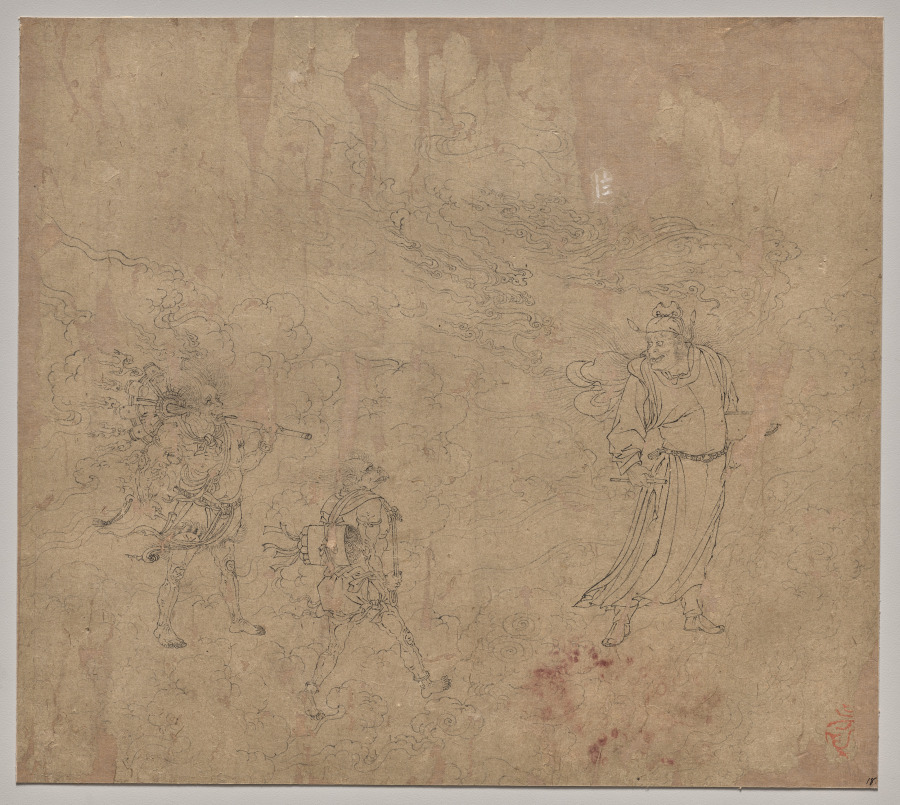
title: Album of Daoist and Buddhist Themes: Procession of Daoist Deities: Leaf 18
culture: China, Southern Song dynasty (1127-1279)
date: 1200s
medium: Album, ink on paper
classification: Painting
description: This leaf is part of an important album of 50 drawings encompassing three subjects: processions of Daoist deities to the celestial spheres, the Ten Kings of Hell, and Erlang’s Campaign to Rid Mount Guankou of Dangerous Beasts (soushan tu 搜山圖). In this section of the Daoist pantheon, Zhong Kui 鍾馗, the hero who fights demons, is portrayed with two ghost attendants. One holds a handle at the end of which is a large wheel with drums. Thunder, which drums can evoke, is a theme of many of the Daoist Pantheon leaves in this album.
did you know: Zhong Kui’s bird-faced attendant carries a load of scrolls on his back.